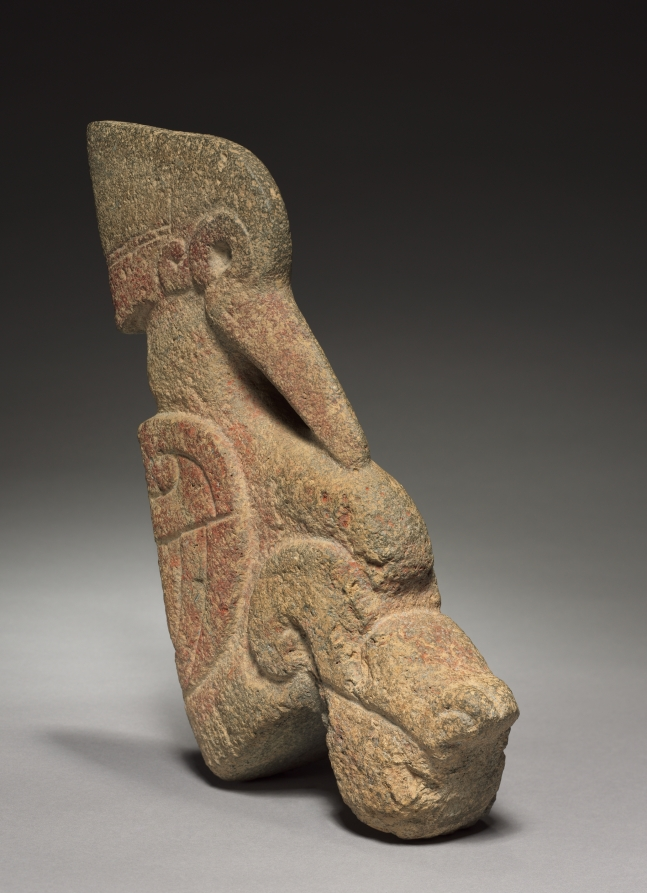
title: Bird Hacha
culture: Mexico, Veracruz, El Tajín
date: 300–900 CE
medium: gray volcanic stone with red pigment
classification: Sculpture